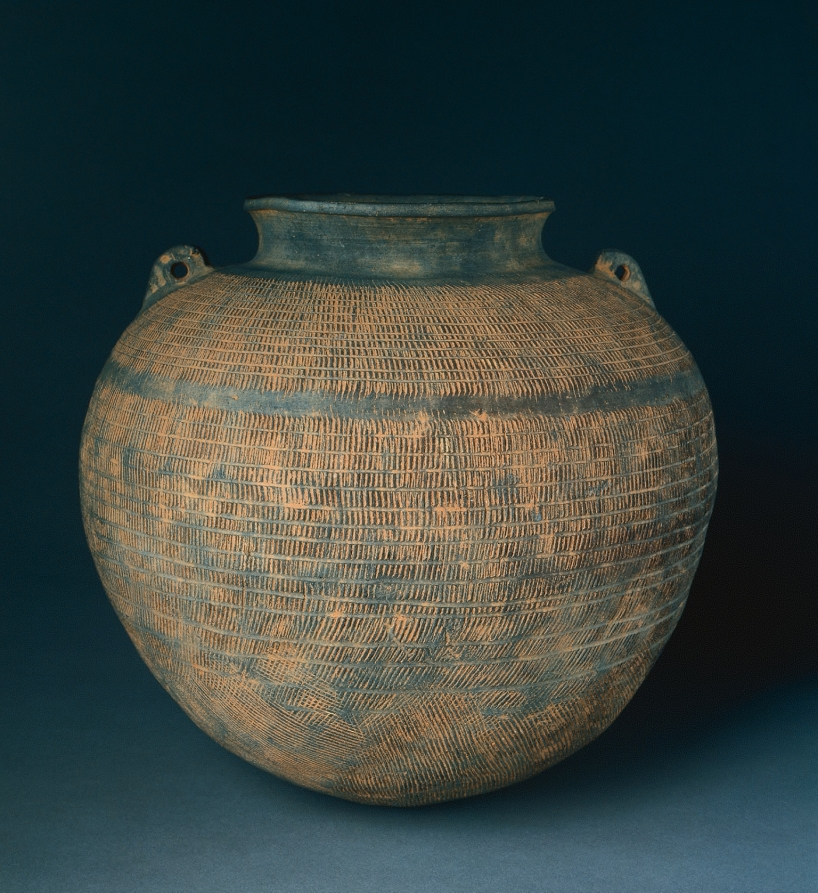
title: Storage Jar with Loop Handles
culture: Korea, Gaya period (42–562 CE)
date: 200s–300s CE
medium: earthenware with impressed and incised designs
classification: Ceramic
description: The function of this type of large jar remains unknown, yet it is highly likely that it was used to store harvested grains and seeds. The loops on its round shoulder suggest that the jar once had a lid fastened by cords, to strengthen its seal. Below its short neck, the vessel’s entire body is decorated with rows of short vertical and diagonal lines probably created by grooving and impressing the clay.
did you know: This large jar may have used to store harvested grains and seeds.